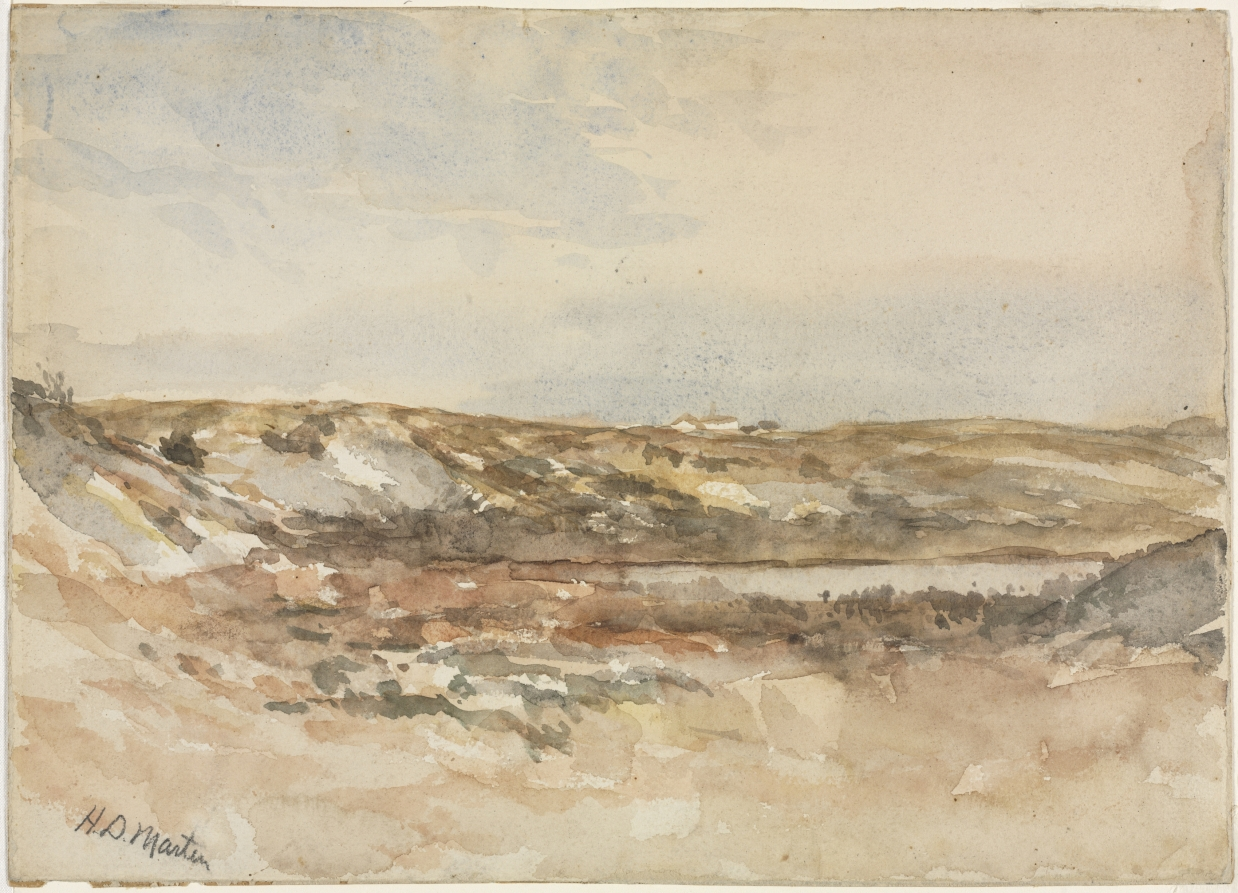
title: Near Newport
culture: America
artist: Homer Dodge Martin (American, 1836–1897)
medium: watercolor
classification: Drawing